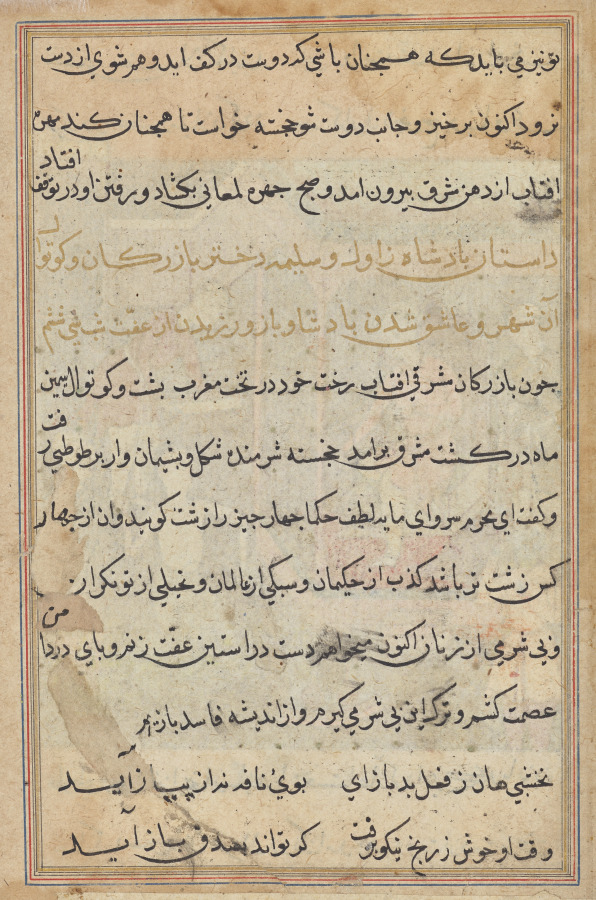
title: Page from Tales of a Parrot (Tuti-nama): text page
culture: Mughal India, court of Akbar (reigned 1556–1605)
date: c. 1560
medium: gum tempera, ink, and gold on paper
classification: Painting